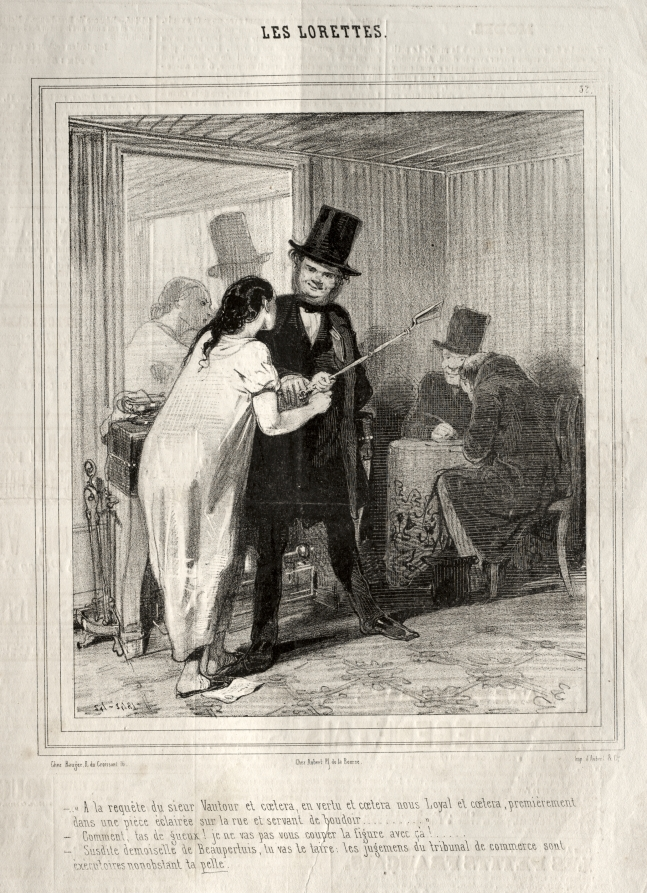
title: Les Lorettes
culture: France, 19th century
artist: Paul Gavarni (French, 1804–1866)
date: 1842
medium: lithograph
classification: Print